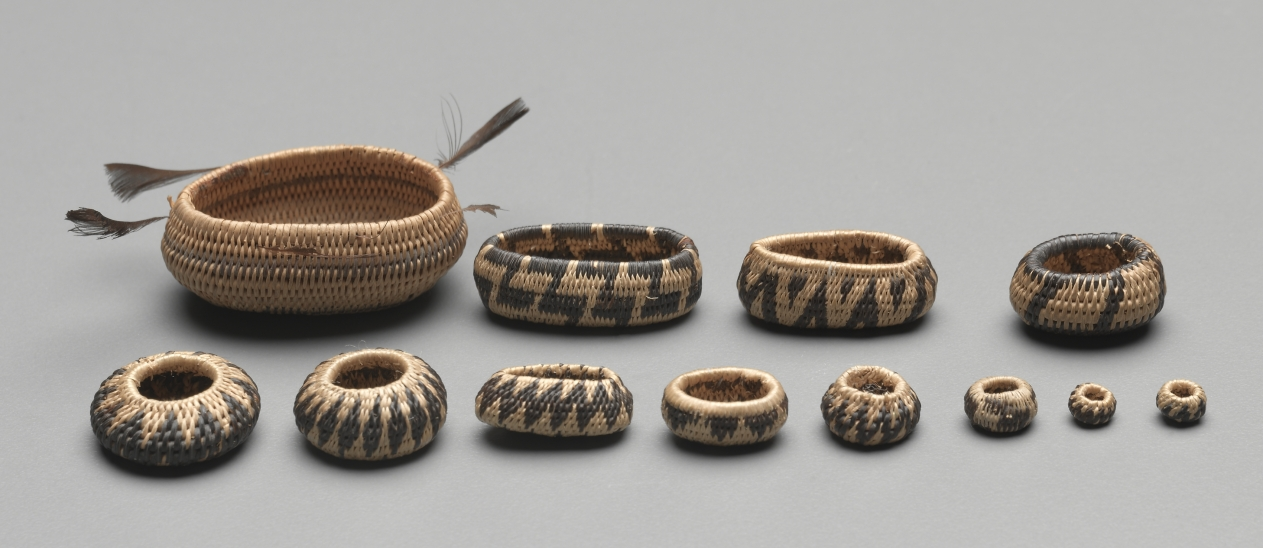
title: Miniature Rhomboidal Basket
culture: California, Pomo, late 19th-early 20th century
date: late 1800s-early 1900s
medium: plant materials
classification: Basketry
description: Miniature baskets were made to demonstrate the basket-maker’s virtuoso skill, and these tiny marvels seem to be no exception—the smallest are just a few millimeters wide but still patterned. For such fine work, dexterity was required as much for preparation of materials as for weaving.